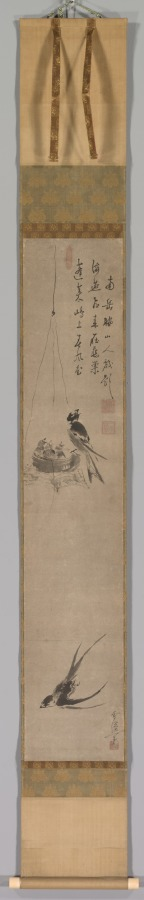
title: Swallows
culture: Japan, Edo period (1615–1868)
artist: Yamaguchi Sekkei (Japanese, 1644–1732)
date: late 1600s–early 1700s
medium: hanging scroll; ink and color on paper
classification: Painting